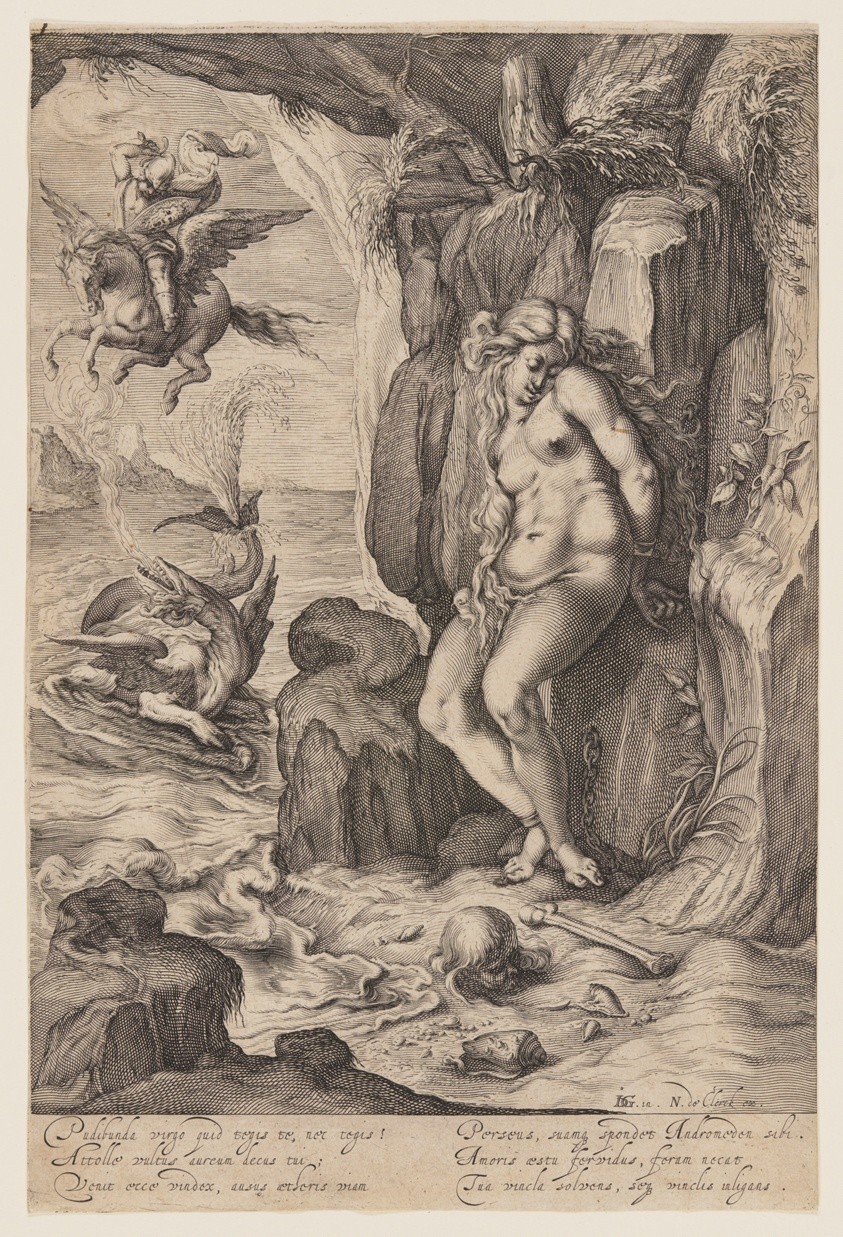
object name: Print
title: Perseus Liberating Andromeda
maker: Attributed to Andries Stock (Netherlandish, 1572/82-after 1648); after Jacques de Gheyn II (Dutch, 1565–1629)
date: c. 1610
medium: Engraving on ivory laid paper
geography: Netherlands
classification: engraving; paper; print; prints and drawing